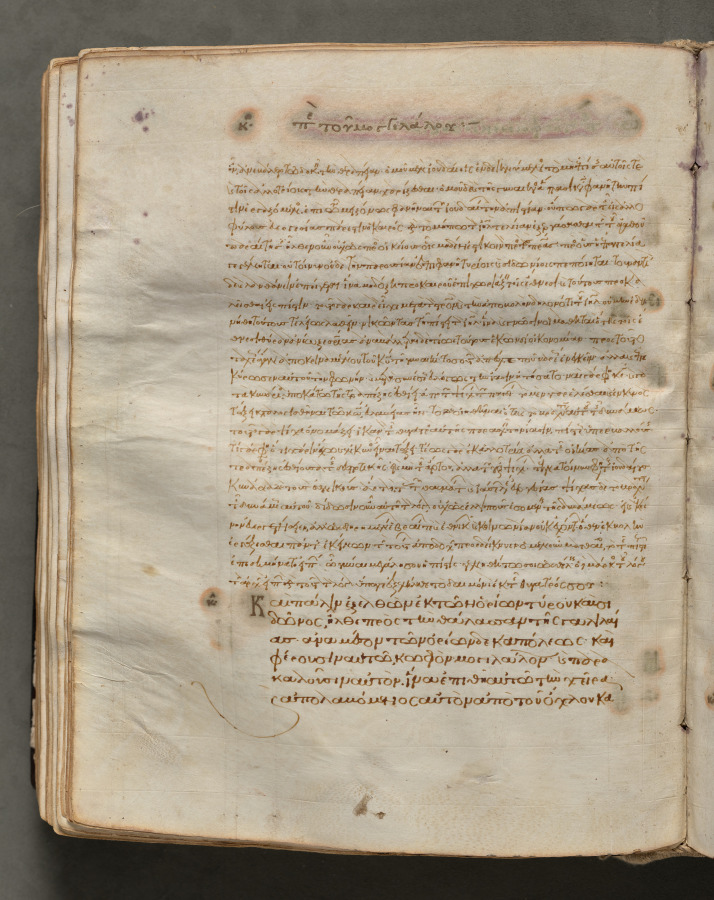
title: Text, folio 156 (verso), from a Gospel Book with Commentaries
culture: Byzantium, Constantinople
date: c. 1000–1100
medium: ink, tempera, and gold on vellum; leather binding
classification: Bound Volume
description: Each of the four gospels in this book opens on a page with brilliantly illuminated borders depicting the author of the text as well as birds-principally peacocks, symbols of the immortality of the soul-and fountains, representing the fountain of life and the salvation of the soul. This volume consists of 428 leaves with texts in Greek. Its level of sophistication suggests that it was probably written and decorated in a monastery in Constantinople.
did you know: Gospel Books were carried in procession through Byzantine churches.